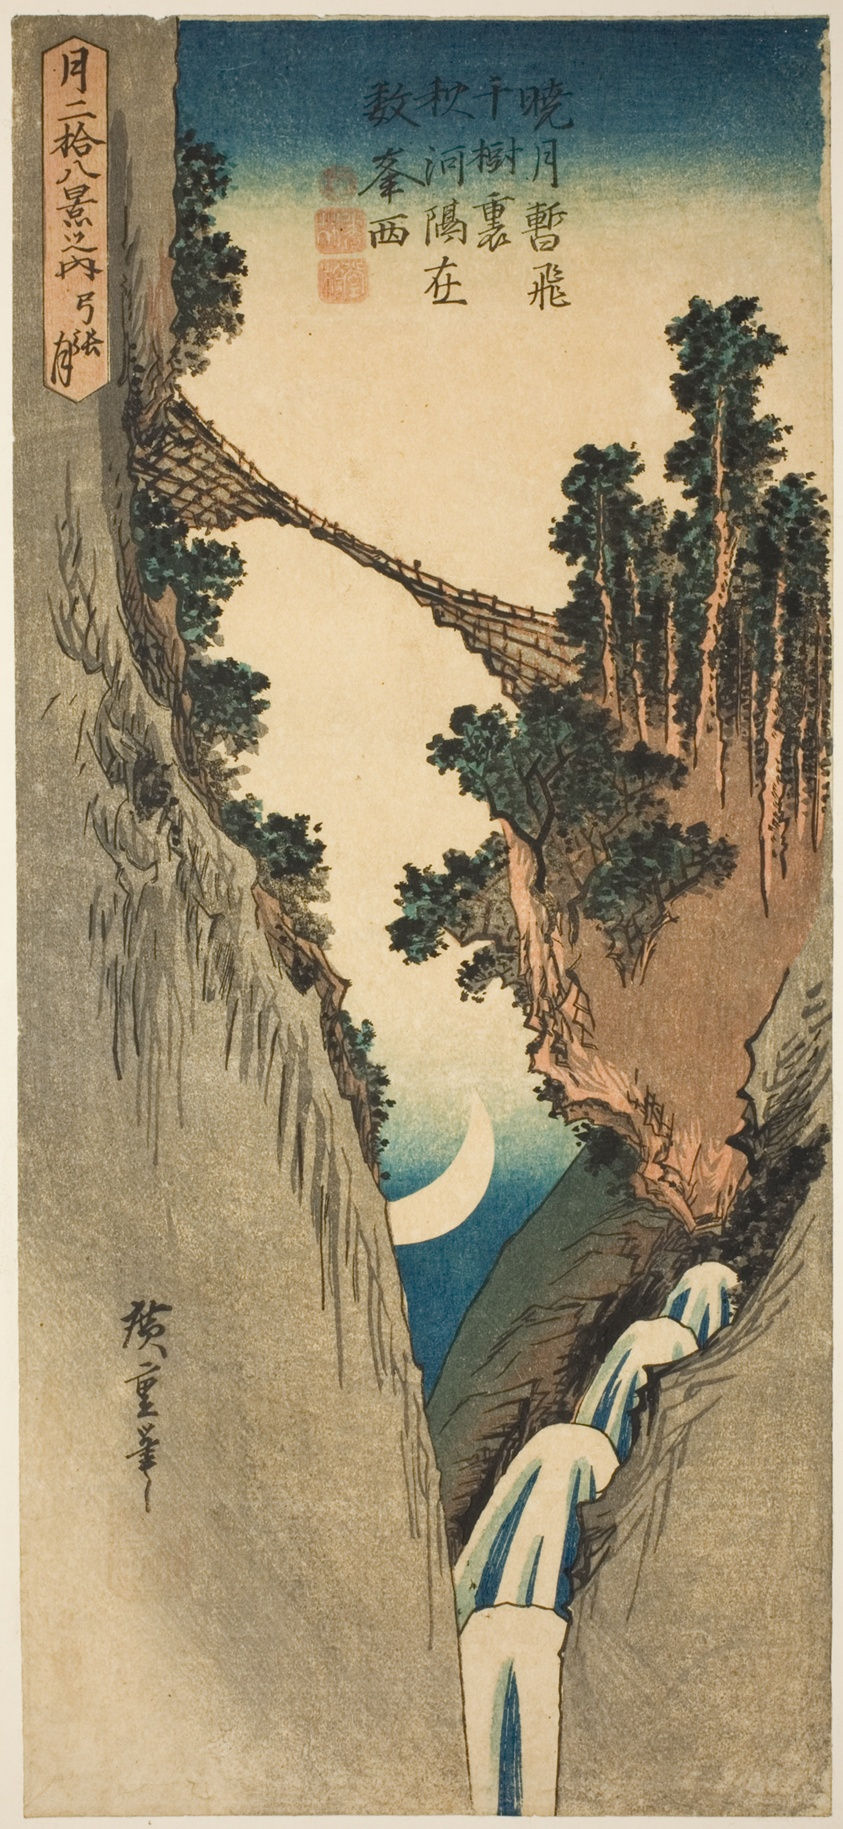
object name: Print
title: Bow-shaped Moon (Yumiharizuki), from the series "Twenty-eight Views of the Moon (Tsuki nijuhakkei no uchi)"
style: Japanese (culture or style)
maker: Utagawa Hiroshige 歌川 広重; Japanese, 1797-1858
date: c. 1832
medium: Color woodblock print; otanzaku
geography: Japan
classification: woodblock print; print; asian art